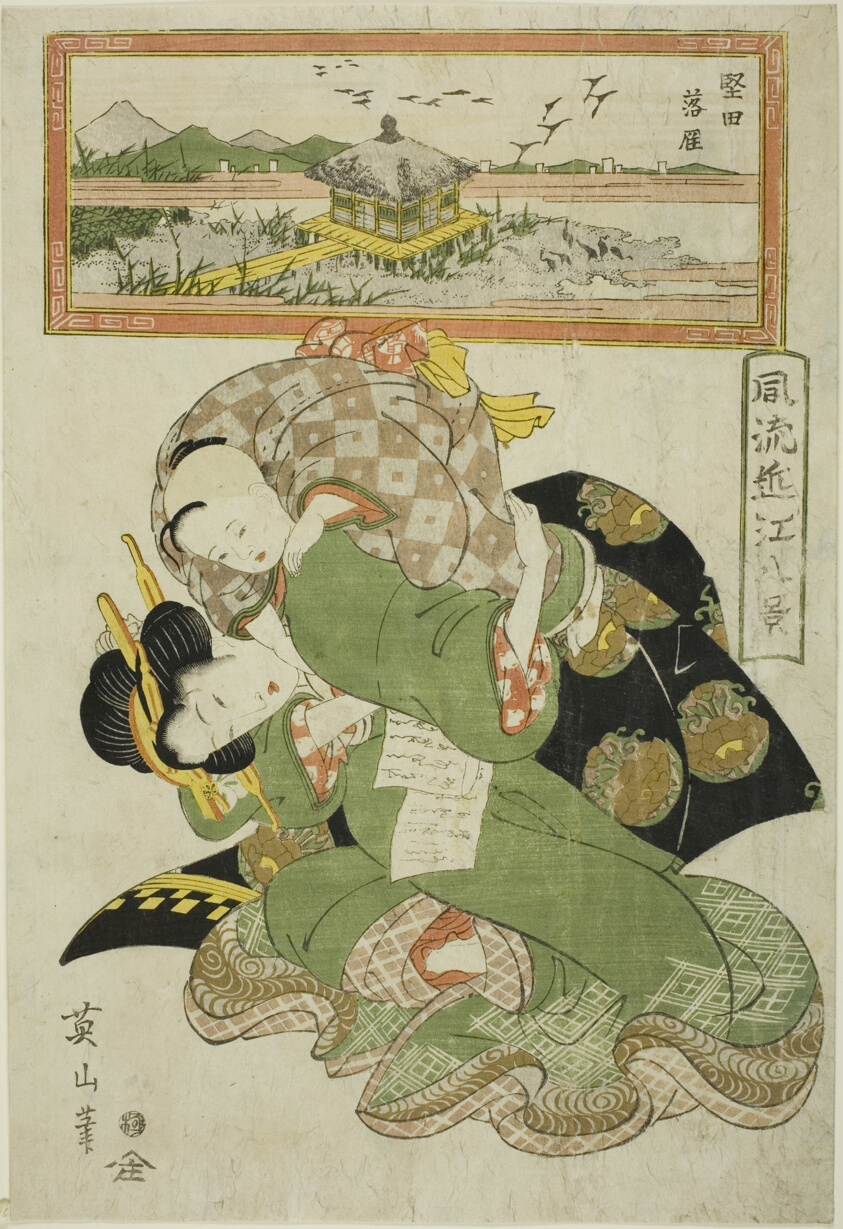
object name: Print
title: Descending Geese at Katada (Katada rakugan), from the series "Fashionable Eight Views of Omi (Furyu Omi hakkei)"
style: Japanese (culture or style)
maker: Kikukawa Eizan (Japanese, 1787-1867)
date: c. 1814/17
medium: Color woodblock print; oban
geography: Japan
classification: woodblock print; print; asian art